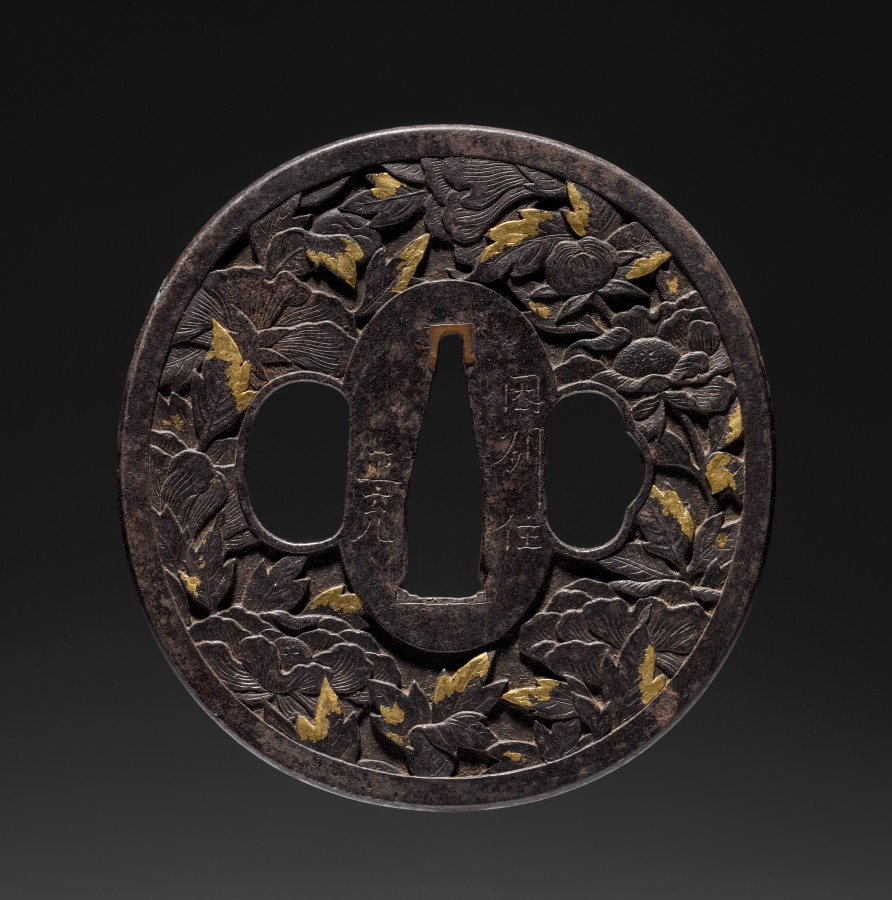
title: Sword Guard (Tsuba) with Peonies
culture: Japan, Edo period (1615–1868)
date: early 1800s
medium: iron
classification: Arms and Armor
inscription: signed: 因州住直充